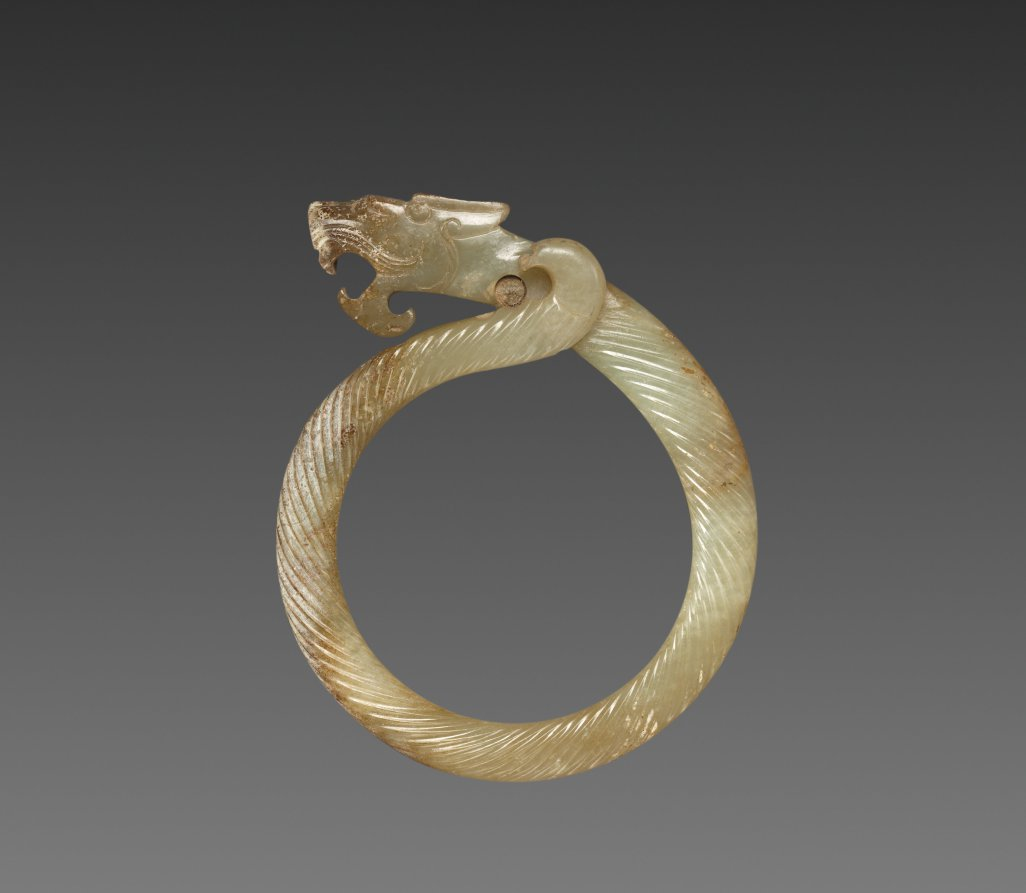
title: Fluted Ring with Dragon Head (Huan)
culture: China, Warring States period (475–221 BCE)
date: 475–221 BCE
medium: jade (nephrite)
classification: Jade